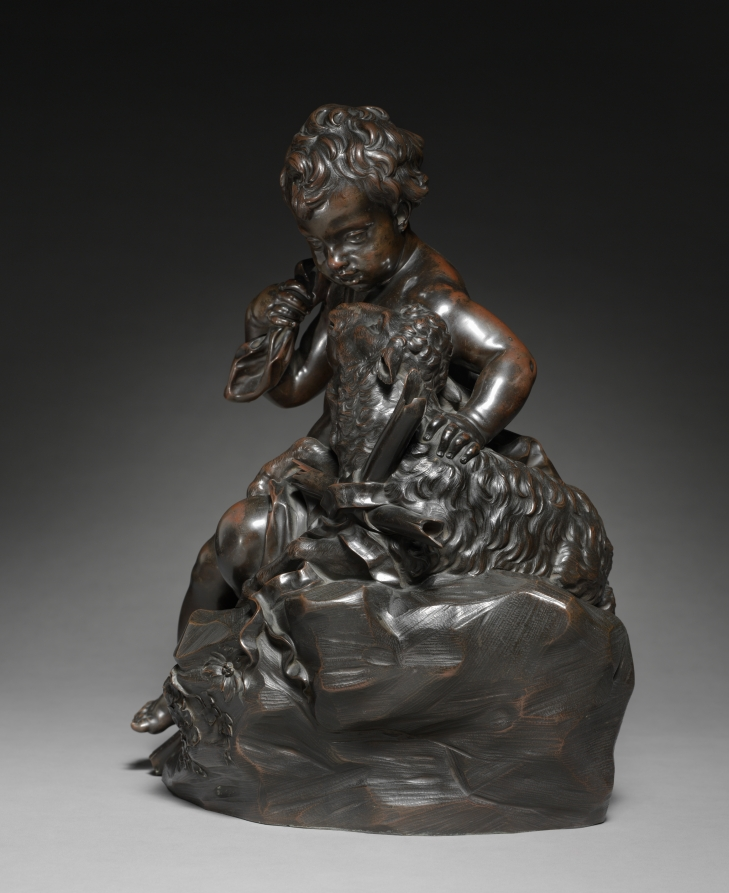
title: Young Saint John and the Lamb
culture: Italy, Florence, 17th century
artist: probably by Giuseppe Piamontini (Italian, 1664–1742)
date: c. 1680–1700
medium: bronze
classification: Sculpture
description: John the Baptist is often accompanied by a lamb as a sign of his intimacy with Christ, the Lamb of God. The depiction of children embracing animals is a motif from antiquity that Piamontini would have known.